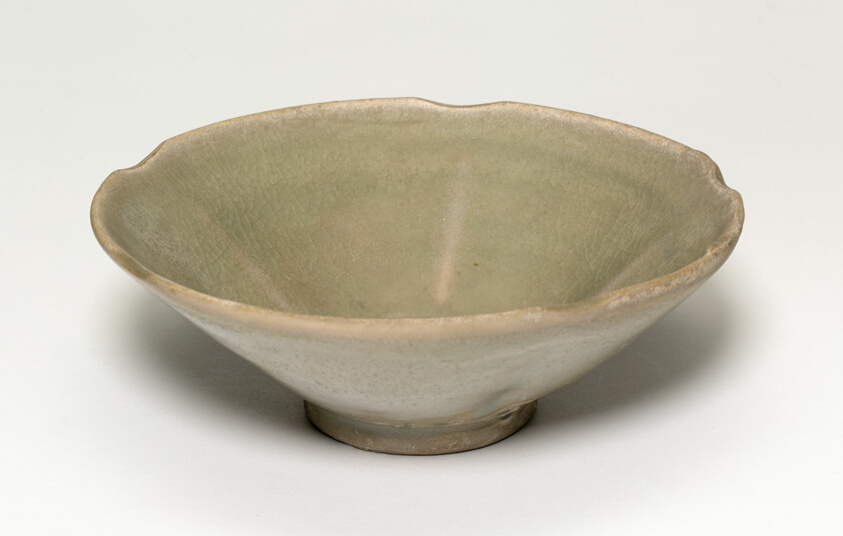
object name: Vessel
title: Lobed Bowl with Phoenix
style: Chinese (culture or style)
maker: China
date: Tang dynasty (618–907) or Five Dynasties period (907–960), late 9th/early 10th century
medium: Yaozhou ware; celadon-glazed stoneware with underglaze molded decoration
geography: China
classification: bowl; porcelain; dish (vessel); asian art; ceramics; vessel